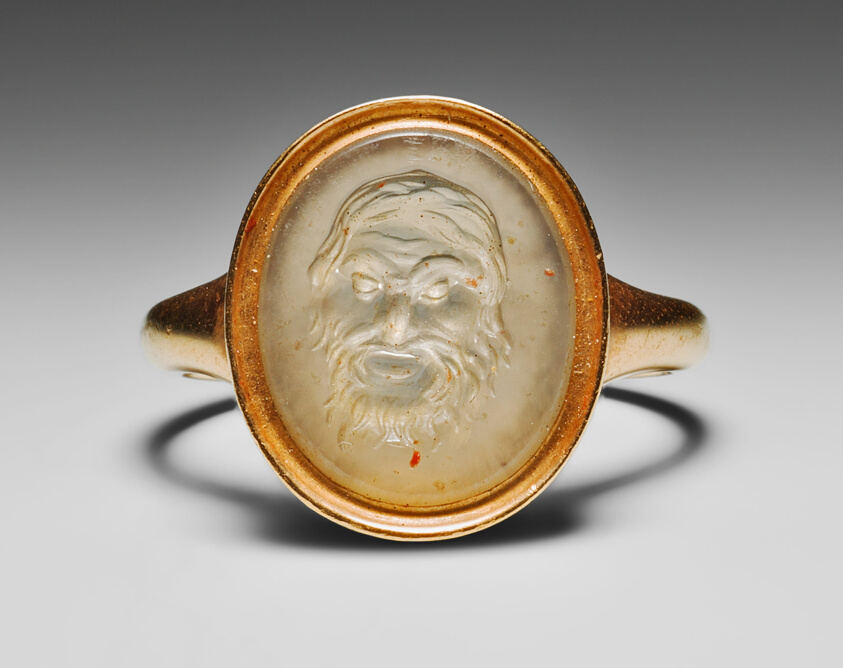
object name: Costume and Accessories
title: Intaglio Depicting a Theater Mask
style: roman (ancient, style or period), ancient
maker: Roman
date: Intaglio: 1st century Setting: date unknown (modern)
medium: Intaglio: gemstone Setting: gold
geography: Roman Empire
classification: ring (jewelry); jewelry; ancient art; costume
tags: theater, masks